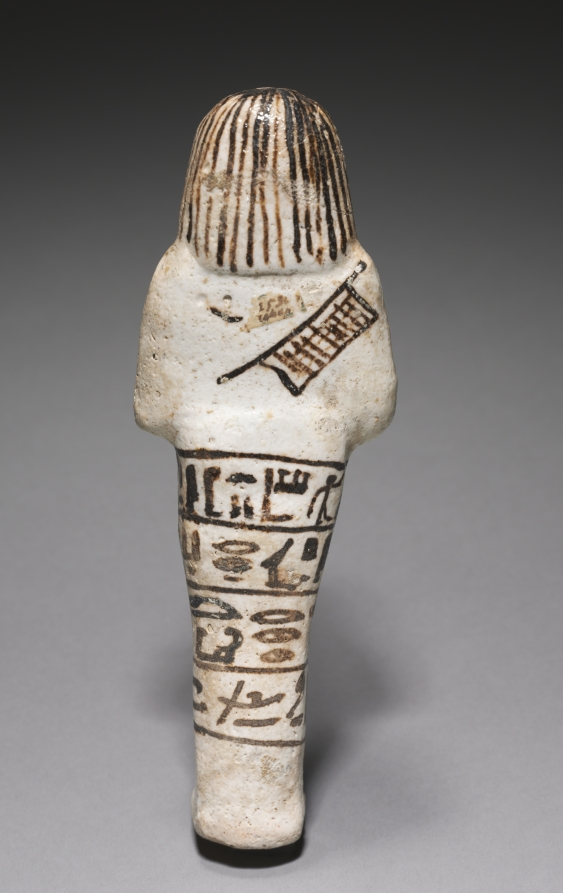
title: Shawabty of Djehutymose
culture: Egypt, New Kingdom (1540–1069 BCE), Dynasty 19, reign of Ramesses II (1279–1213 BCE)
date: 1279–1213 BCE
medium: polychrome faience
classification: Funerary Equipment